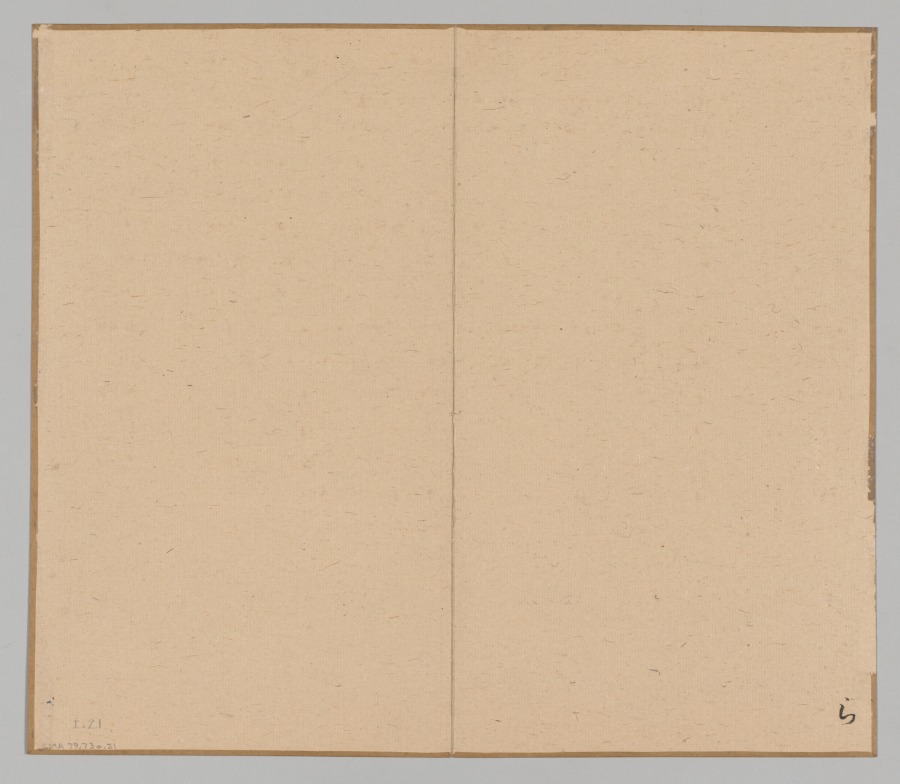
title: Reverberations of Taiga, Volume 1 (leaf 21)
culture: Japan, Edo period (1615–1868)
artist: Aoki Shukuya (Japanese, d. 1802)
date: mid- to late 1700s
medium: double-leaf from a pair of albums; ink and light color on paper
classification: Portfolio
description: Traditionally, young painters in Japan began their studies with an established master-painter. The master's compositions invariably became models that the apprentice copied to learn various ink and brush techniques. Shukuya was a pupil of the famous Kyoto artist Ikeno Taiga, whose style is reflected in these sketches of rocks, trees, and mountains.